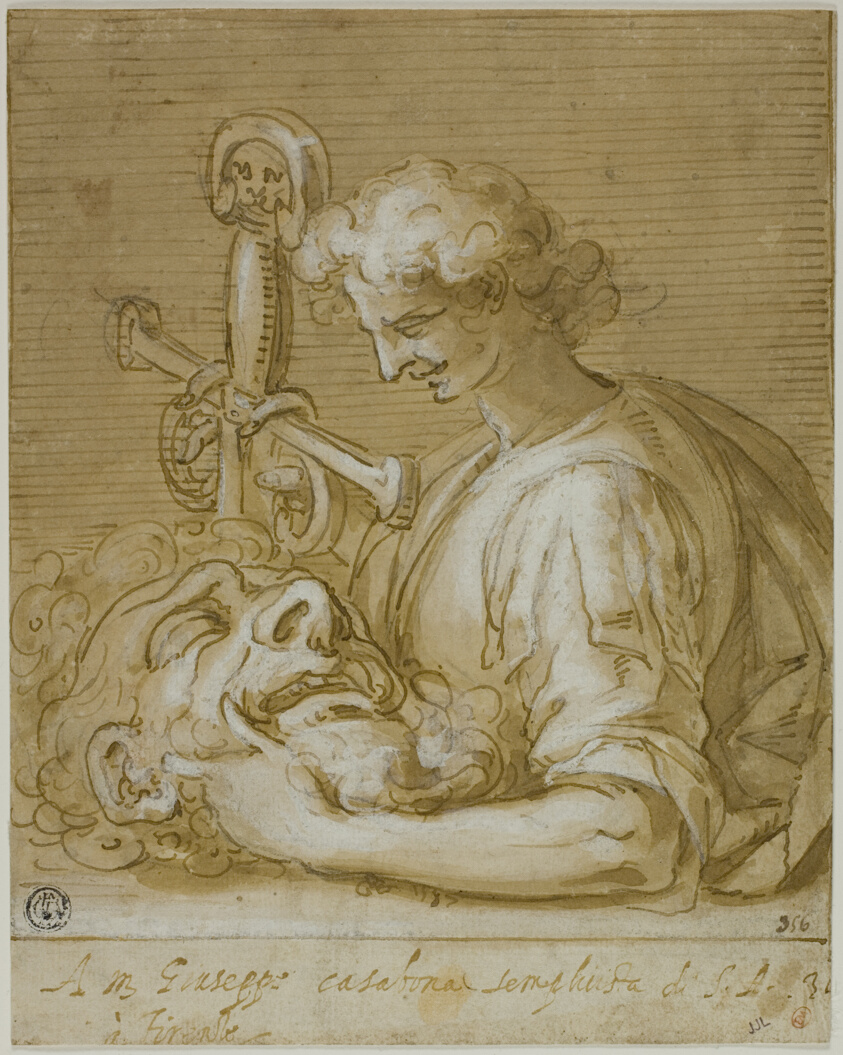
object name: Drawing and Watercolor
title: David with Goliath's Head and Sword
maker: Giovanni Battista Paggi (Italian, 1554-1627)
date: 1587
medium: Pen and brown ink with brush and brown wash, heightened with lead white and traces of graphite, on ivory laid paper, laid down on ivory laid paper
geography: Italy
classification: ink with wash; drawings (visual works); prints and drawing